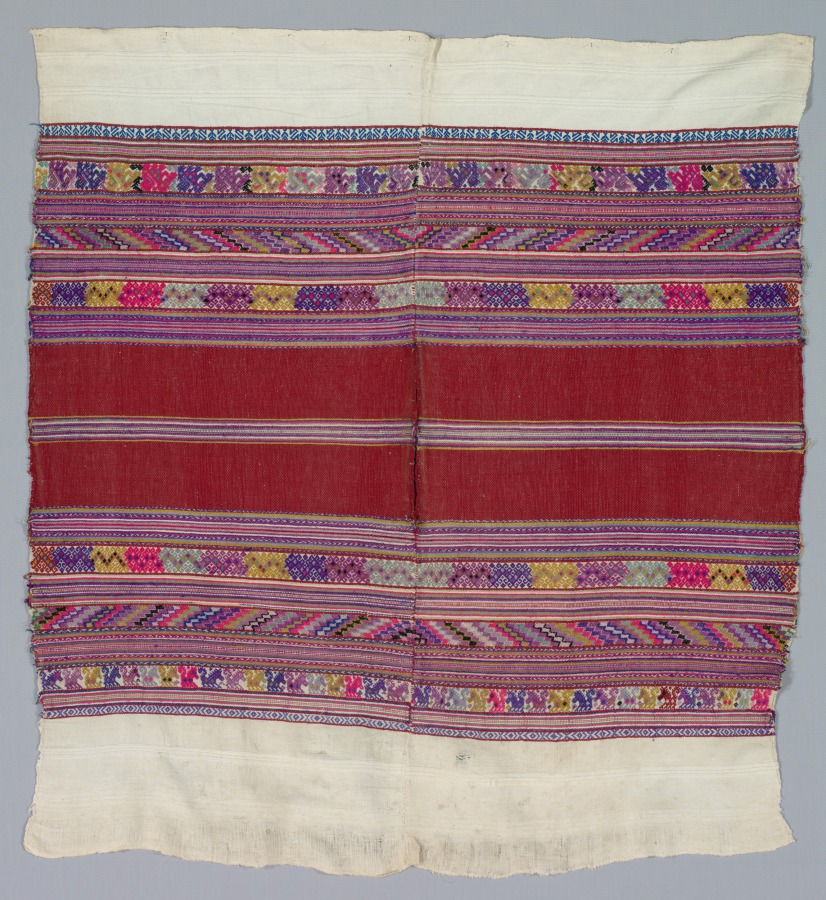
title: Huipil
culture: Guatemala, Quetzaltenango, late 19th or early 20th century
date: late 1800s or early 1900s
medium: woven wool and embroidered wool and silk on cotton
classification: Textile